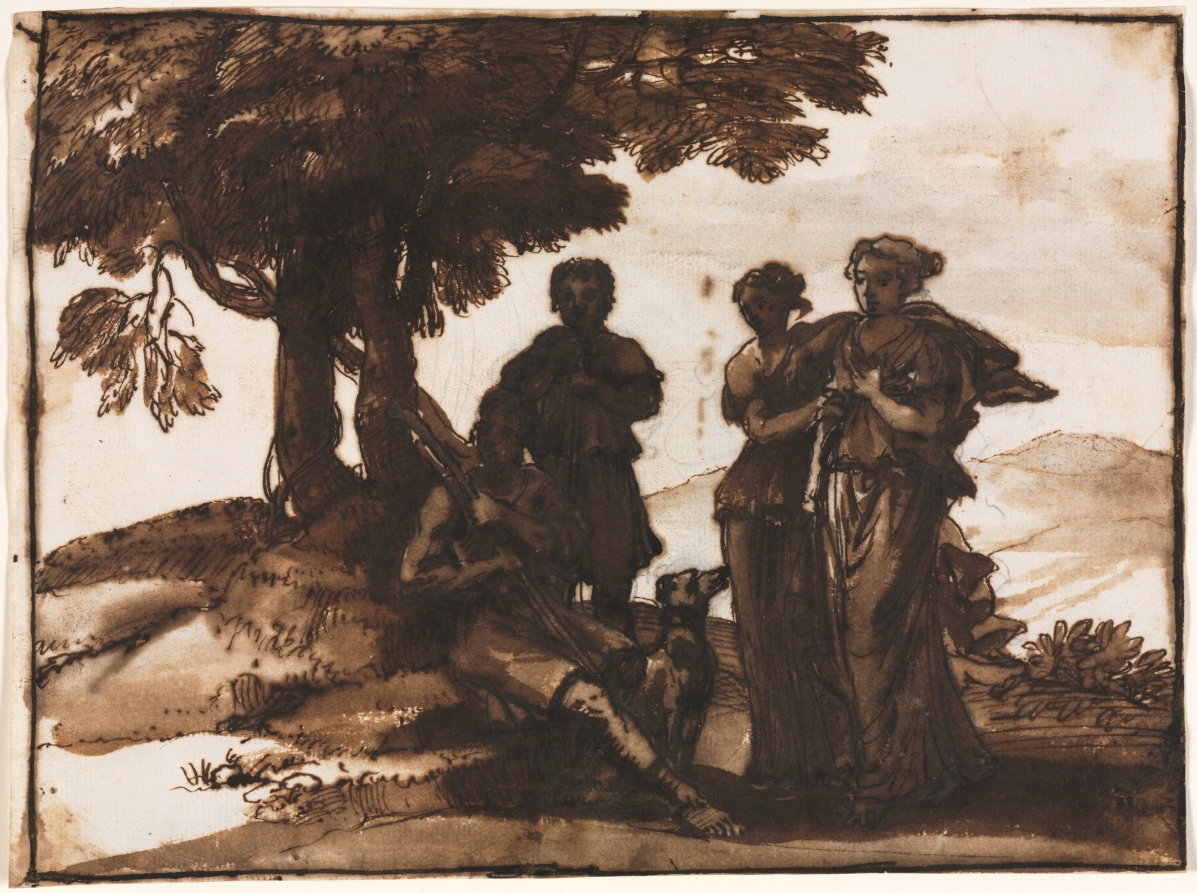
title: Pastoral Scene with Classical Figures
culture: France, 17th century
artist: Claude Lorrain (French, 1604–1682)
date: c. 1640–1645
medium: pen and brown ink and brush and brown and gray wash over graphite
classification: Drawing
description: Claude Lorrain changed the direction of European landscape painting by opening up vistas that fade into either morning or evening sun. A prolific draftsman, he emphasized the tranquil and idyllic nature of the Roman countryside.